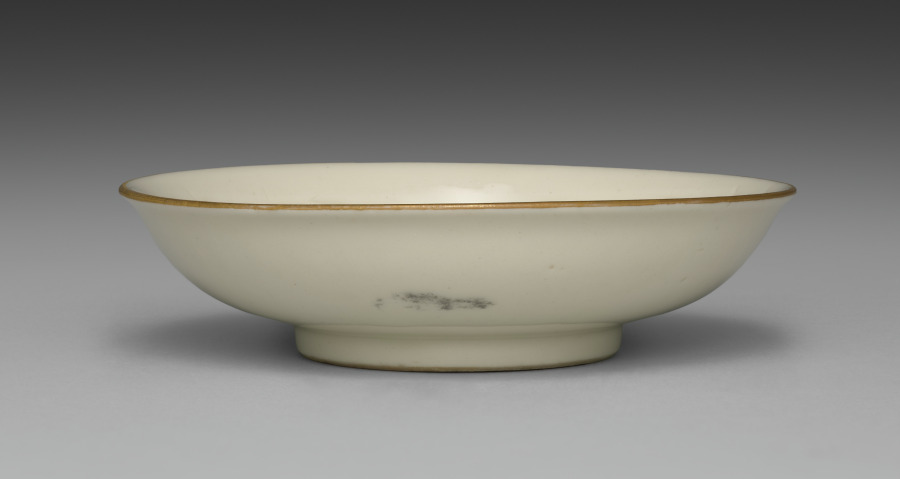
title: Small Dish from Dining Set with Plum Blossoms and Cracked-Ice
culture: Japan, Meiji period (1868–1912)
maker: Seifū Yohei II (Japanese, 1844–1878)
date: c. 1875–78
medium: Porcelain with molded designs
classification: Ceramic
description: Each item in this set has a delicate low-relief design of flowering plum branches over scattered, intersecting lines meant to resemble the cracked-ice surface of a frozen body of water and is signed on the base in gold pigment. While Yohei II produced many fine works in underglaze blue, like those produced by Kiyomizu Shichibei, he also made works in quite different styles later in his career, from the early 1870 s. In 1873, he was appointed purveyor to the Industrial Center of Kyoto Prefecture, a designation associated with Kyoto’s efforts to reach an international market through the port of Kobe; and from 1875 until his death, he was involved in national-level projects to present Japanese ceramics across the world. It was during this period that Yohei III was apprenticed to Yohei II, and it has been suggested that this set may in fact be an early example of Yohei III’s work, which he signed with his teacher’s name. Decorated with flowers resembling Japanese textile motifs, the set calls to mind the design of Yohei II’s pair of vases with plum blossoms in the Victoria and Albert Museum. Here, the elaborate trees created for a formal public exhibition setting have been translated into the approachable blossoms of the genteel domestic environment. While the designs are consistent across the pieces, each raised flower petal and pistil and each incised line in the ice was done by hand, so the cups, bowls, and dishes are similar yet unique. The bottoms of two boxes once identified the set’s owner, but the information has been deliberately obscured with black ink. However, inscriptions still visible appear to indicate two occasions, once at the end of July 1886 , and once again in June 1916 , when parts of the set were requested from Hokura in Niigata Prefecture. The location corresponds to a neighborhood in the present-day city of Jōetsu. The surname Tsuji 辻 also appears on a paper tag affixed to one of the box cloths. Future research may possibly reveal more about their provenance. A vase by Yohei III in a private collection combines the formal grandeur of the Yohei II vases in the Victoria and Albert Museum with the gentler design of this dining set, placing flowering plum trees against soft, scalloped-edge clouds resembling those in golden screens.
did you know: The dining wares have a creamy white coloration that the four boxes containing them identify as Korean in style.